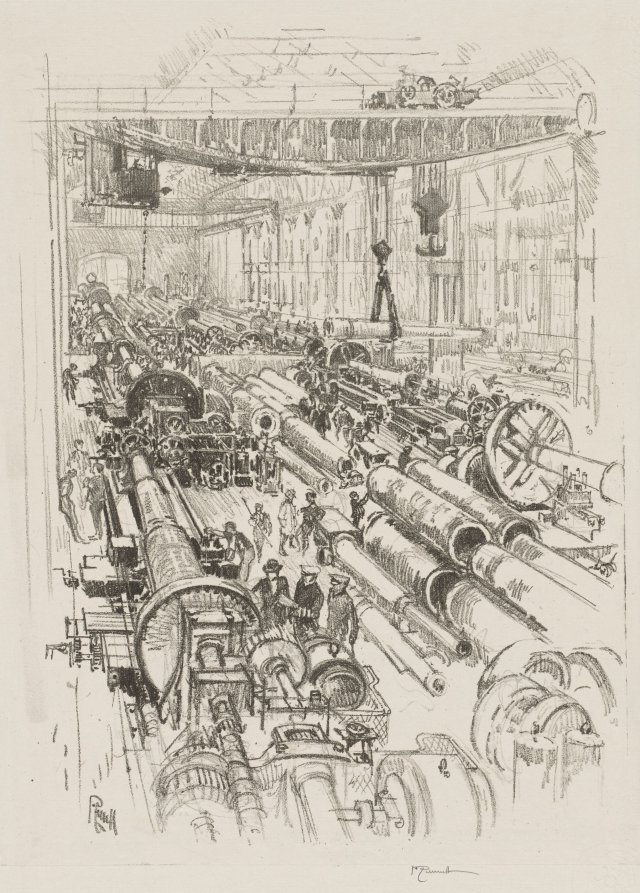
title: English War Work: The Gun Shop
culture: America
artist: Joseph Pennell (American, 1857–1926)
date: 1916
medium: lithograph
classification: Print